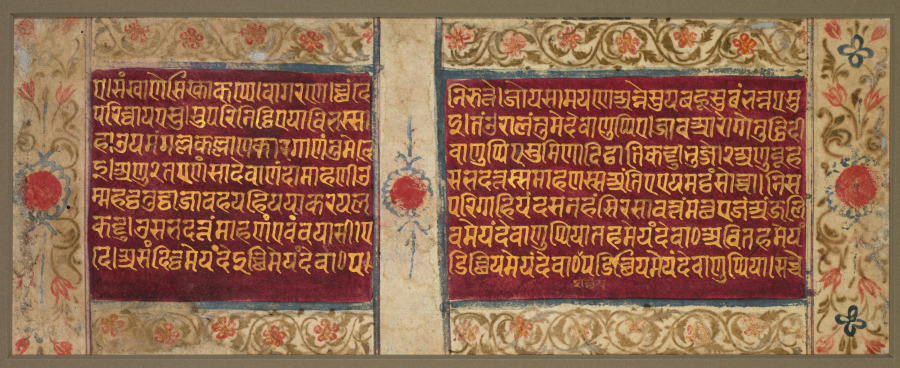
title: Text, folio 5 (verso), from Brahman Rishabhadatta's speech, from a Kalpa-sutra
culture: Western India, Gujarat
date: c. 1475–1500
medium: gum tempera and gold on paper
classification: Painting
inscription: [[recto, beginning with line 1]] devāṇuppie | sumiṇā diṭṭhā | taṁ || attha lābho devāṇuppie | bhoga lābho | sutta lābho | sukha lā- [line 2] bho de° || evaṁ khalu tumaṁ devāṇuppie navaṇhaṁ māsāṇaṁ bahupaḍipunnāṇaṁ | addh’aṭṭhamāṇaṁ rāïṁdi- [line 3] yāṇaṁ | viïkkaṁtāṇaṁ sukumāla-pāṇi-pāyaṁ | ahīṇa-paḍipunna-paṁc’iṁdiya-sarīraṁ lakkhaṇa-vaṁjaṇa-gu- [line 4] ṇovaveyaṁ māṇ’ummāṇa-pamāṇa-paḍipunna-sujāya-savv’aṁga-suṁdar’aṁga | sasi-somākāraṁ | kaṁtaṁ piyadaṁ | [line 5] saṇaṁ surūvaṁ dārayaṁ payāhisi | se vi ya ṇaṁ dārae | ummukka-bāla-bhāve vinnāya-pariṇaya-mitte | jo- [line 6] vvaṇagam’anupatte | riuveya-yaüvveya-sāma|veya|-atthavvaṇaveya iïhāsaṁ paṁcamāṇaṁ nighaṁṭu-cha- [line 7] ṭṭhāṇaṁ s’aṁgovaṁgāṇaṁ sarahassāṇaṁ | caüṇhaṁ veyāṇaṁ sārae pārae dhārae saḍ’aṁgavī saṭṭhi-taṁtaṁ visāra-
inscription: [[verso, beginning with line 1]] e | saṁkhāṇe sikkhā kappe | vāgaraṇe | cchaṁde nirutte | joyasām=ayaṇe annesu ya bahūsu baṁbhannaesu [line 2] parivvāyaesu | supariniṭṭhie yāvi bha[vi]ssa|i taṁ orālaṁ tume devāṇuppie | jāva ārogge-tuṭṭhidī- [line 3] –hāüya-maṁgalla-kallāṇa-kāragā ṇaṁ tume devāṇuppie sumiṇā diṭṭhā ti kaṭṭu bhujjo 2 aṇuvūha- [line 4] ï | aṇu 2 tae ṇaṁ sā Devāṇaṁdā māhaṇī Usabhadattassa māhaṇassa aṁtie eyam=aṭṭhaṁ soccā | nisa- [line 5] mma haṭṭha-tuṭṭhā jāva haya-hiyayā kara-yala-pariggahiyaṁ dasa-nahaṁ sirasā vattaṁ matthae jaṁ aṁjali [line 6] kaṭṭu | Usabhadattaṁ māhaṇaṁ evaṁ vayāsī | evam=eyaṁ devāṇuppiyā taham=eyaṁ devā° avitaham=eyaṁ [line 7] de | asaṁdiṭṭham=eyaṁ de icchi[ya]m=eyaṁ devā° pa|ḍicchiyam=eyaṁ devā° paḍicchiyam =eyaṁ devāṇuppiyā | sacce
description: Manuscripts of the Kalpa-sutra are sacred embodiments of Jain doctrine. For this reason, they are worthy of beautification, adornment, and celebration by the inhabitants of heaven, such as the celestial dancers under cusped arches on this page. The commissioning of a manuscript is believed to cleanse donors of the karmic effects of past wrongdoing. Wealthy donors gained prestige in the community with the costly production of a sacred manuscript.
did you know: The "further eye" extending beyond the bounds of the face is a characteristic of 15th-century painting.